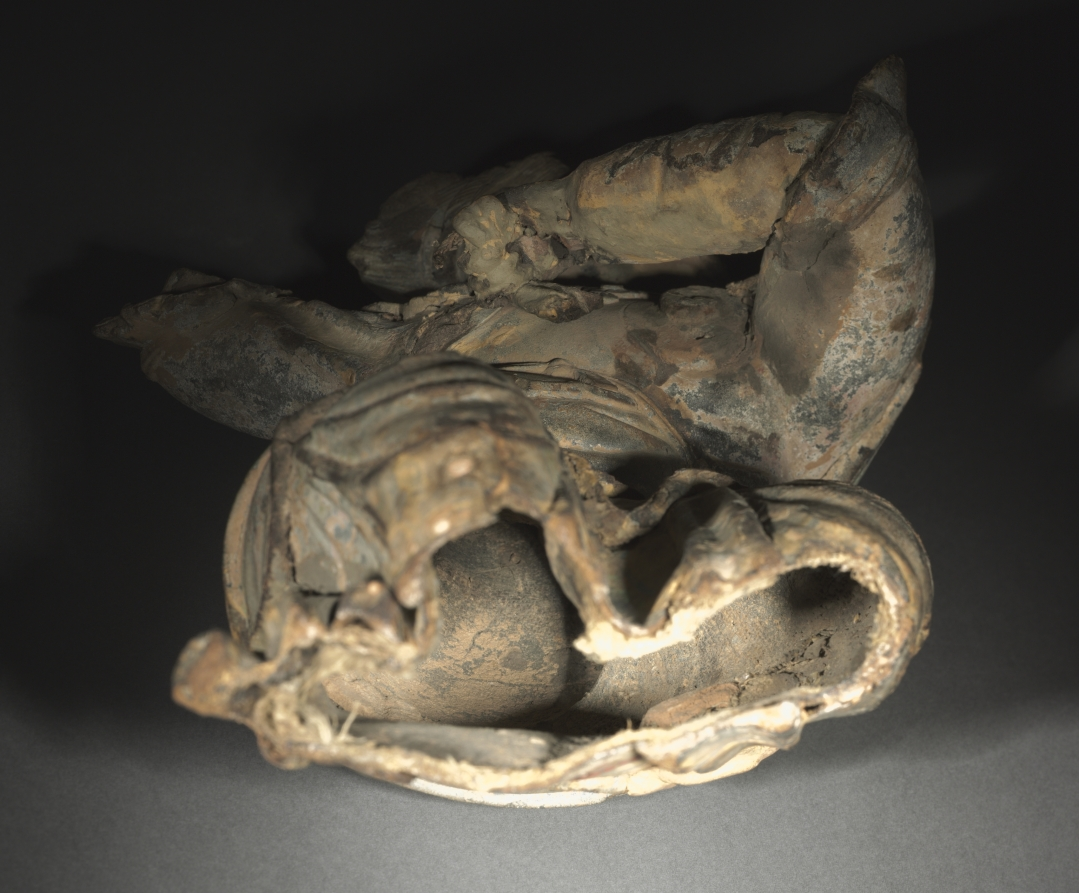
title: Dancing Apsaras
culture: China, late Tang dynasty (618–907) to Five dynasties (907–960)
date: 900s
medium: dry lacquer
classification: Sculpture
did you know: The sculpture was made from a rare technique involving alternate layers of cloth and lacquer, modeled on an armature or around a removable clay core.